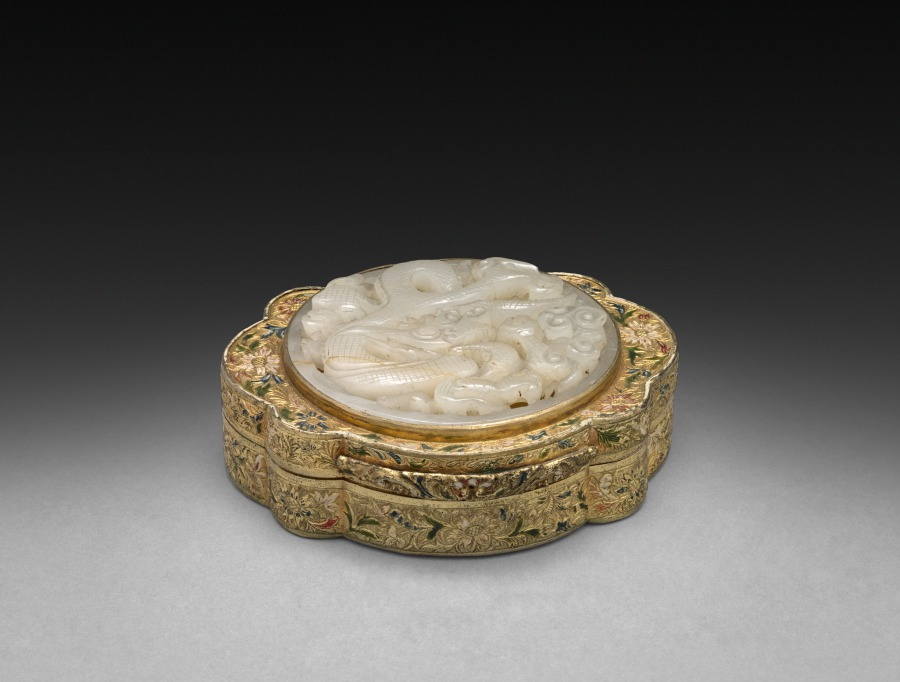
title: Box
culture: China, Qing dynasty (1644-1911) or Republican period (1912-49)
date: 1900–1916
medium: gilt and enamel with with jade medallion in cover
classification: Enamel